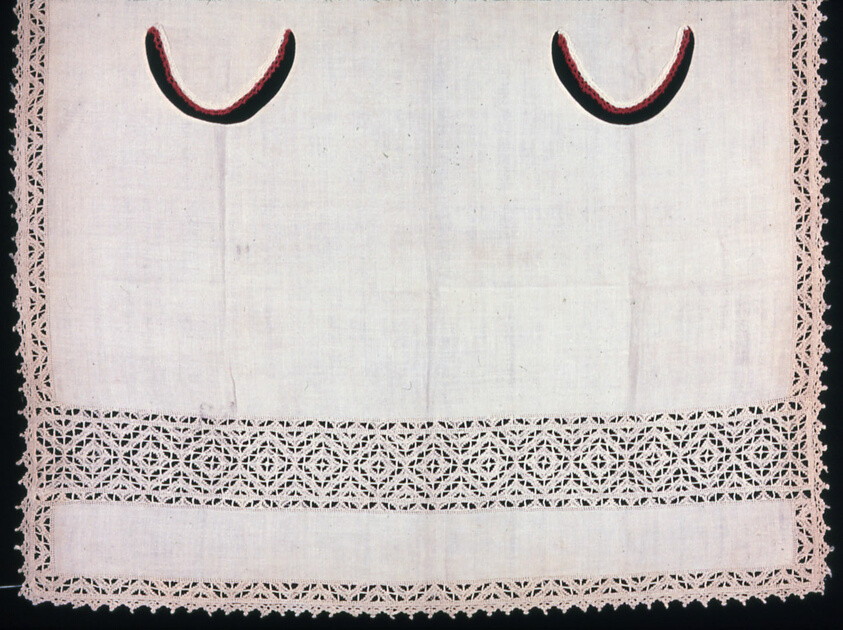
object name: Costume and Accessories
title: Child's Apron (Made from a Cover)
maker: Italy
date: 1875/1900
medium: Linen, needle lace work on a plain weave cut and drawn thread work grid; armholes trimmed with machine-made lace and bobbin-straight lace tapes; embroidered in double hem, hem, and overcast stitches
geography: Italy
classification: textile; lace - needle; costume